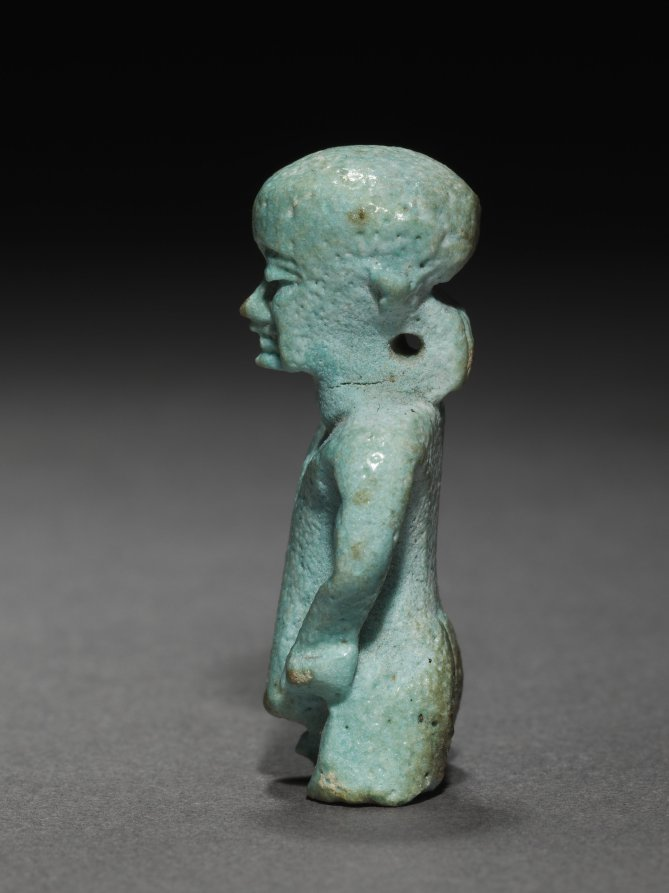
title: Amulet of Pataikos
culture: Egypt, Greco-Roman period (332 BCE–395 CE), Ptolemaic dynasty (305–30 BCE)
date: 305–30 BCE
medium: pale blue faience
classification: Amulets